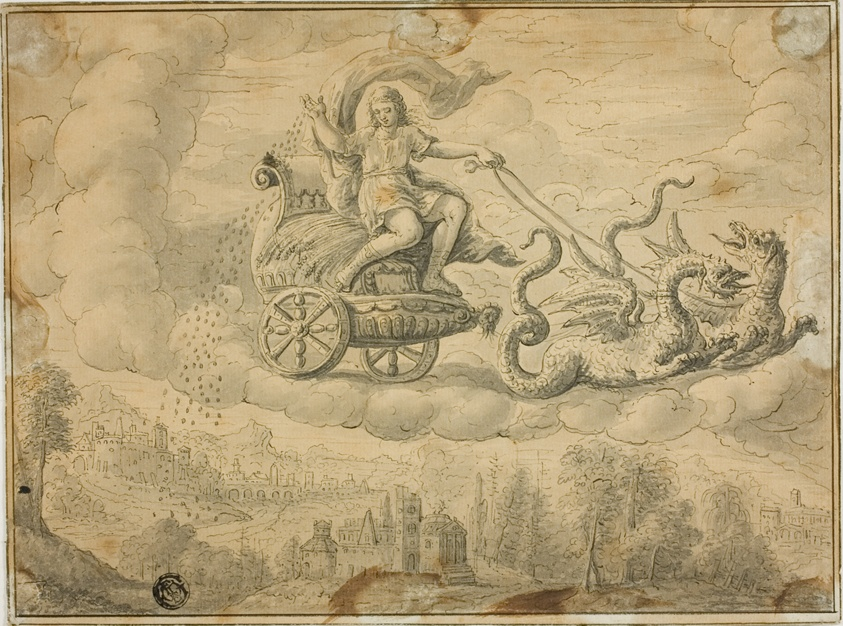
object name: Drawing and Watercolor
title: Triptolemus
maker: Possibly after Marten de Vos (Flemish, 1532-1603); or François Boitard (French, c. 1670-c. 1715); or Philibert Benoît Delarue (French, 1718-1780)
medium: Pen and black ink, with brush and gray wash, on tan laid paper, laid down on fabric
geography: Flanders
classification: pen and ink drawings; drawings (visual works); prints and drawing